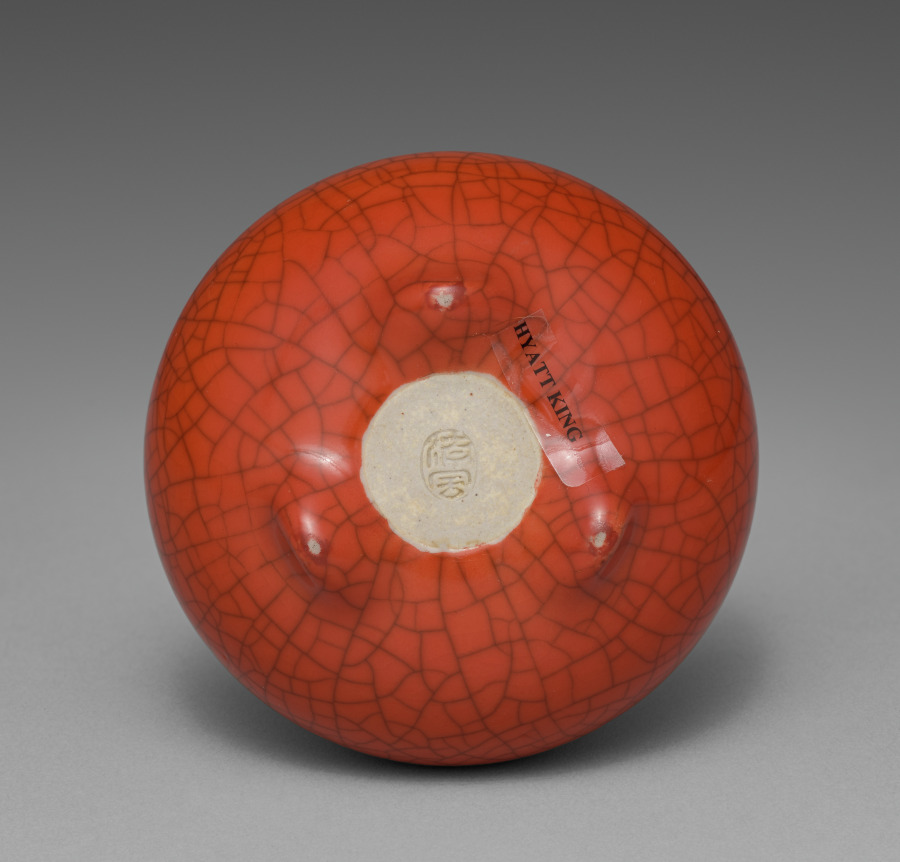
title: Incense Burner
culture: Japan, Meiji period (1868–1912)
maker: Seifū Yohei III (Japanese, 1851–1914)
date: 1893–1914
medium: Porcelain with coral red and crackled glaze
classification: Ceramic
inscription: 清風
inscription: "Hyatt King"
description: The tiniest of containers, this ovoid tripod is an incense burner. It likely once had an openwork metal lid. It is remarkable for its coral red color and crackled glaze. In contrast to the exterior, the interior has been left white under a transparent glaze. The “coral red glaze” is one Yohei III developed in 1887 and called sangōyu. Sensational among colors known at that time, Yohei III won first prize for his work glazed with it at the annual exhibition of the Japan Art Association (Bijutsu Kyokai) in 1888.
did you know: Seifū Yohei III’s incense burner has a red glaze that is difficult to achieve.